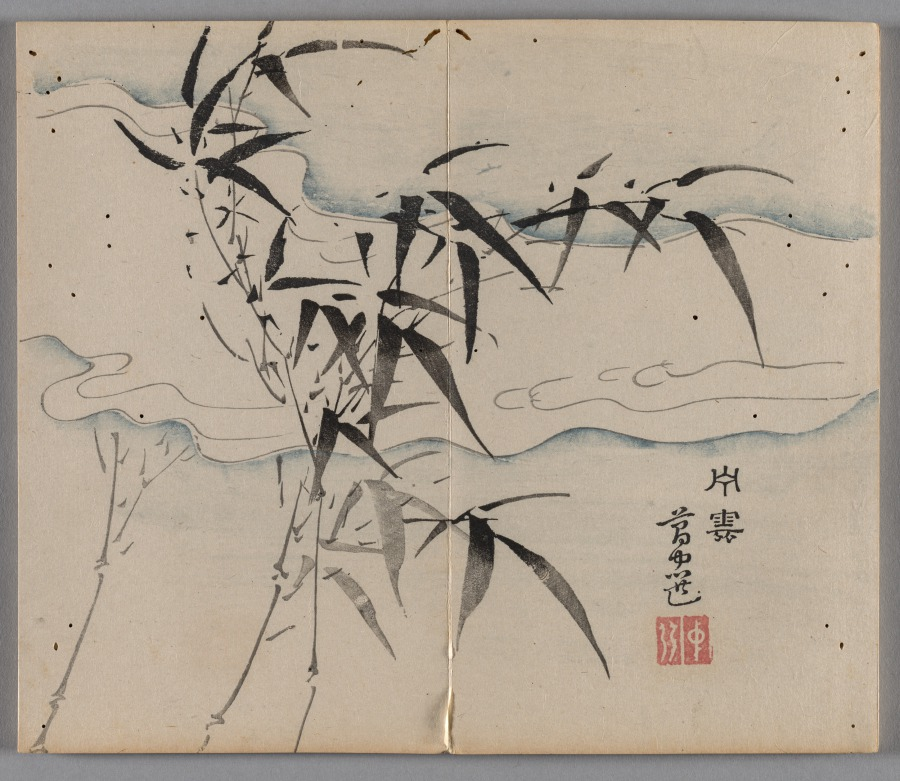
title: Ten Bamboo Studio Painting and Calligraphy Handbook (Shizhuzhai shuhua pu): Bamboo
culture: China, Qing dynasty (1644-1911)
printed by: Hu Zhengyan (Chinese, c. 1584–1674)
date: 1633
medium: Woodblock-printed book; ink and colors on paper; first edition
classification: Print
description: Color printing reached a level of perfection in the early 1600s, as seen in this Ten Bamboo Studio Collection of Calligraphy and Painting and the Mustard Seed Garden Manual of Painting (printed 1679 and 1701). The painterly quality, precision in registering (aligning) the woodblocks, and harmonious colors made them the most successful color print editions in Chinese history. Both editions were printed and compiled in Nanjing, spread nationwide, and had a great impact on the arts in Japan and Korea.